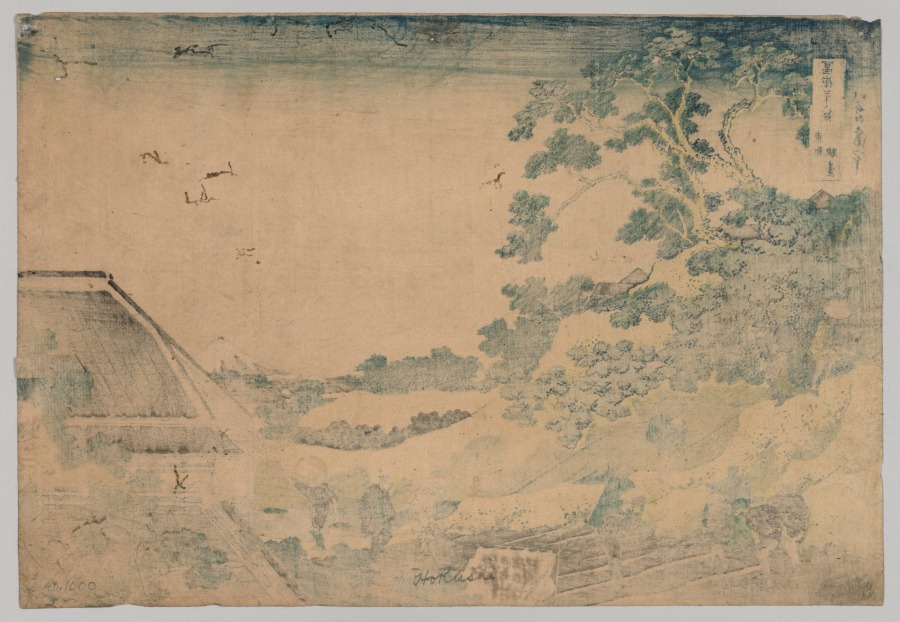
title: Fuji from Surugadai, in Yedo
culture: Japan, Edo period (1615–1868)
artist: after Katsushika Hokusai (Japanese, 1760–1849)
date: 1760–1849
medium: color woodblock print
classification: Print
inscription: Signature: Hokusai aratame I-itsu fude